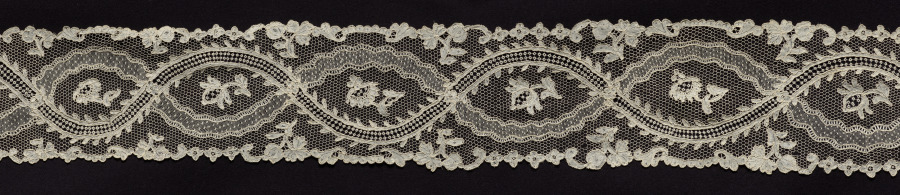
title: Lace Lappet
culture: France, Argentan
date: 1715–74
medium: Linen: needle lace (Point de Argentan)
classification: Lace